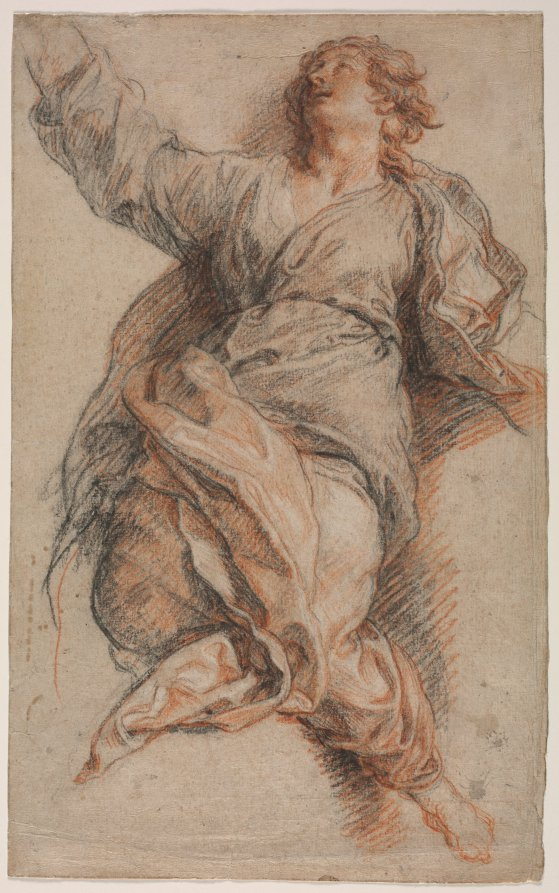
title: St. John the Evangelist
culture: France, 18th century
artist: Charles de La Fosse (French, 1636–1716)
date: c. 1700–1702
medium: black, red, and white chalk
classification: Drawing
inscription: verso, center, in brown ink: 191 [underlined with flourish]; upper left, in graphite: Lot 353 [underlined] / Hotel Drouot / Vente Chardey / 14-17 Mai/77; lower left, in graphite: C. Delafosse [underlined]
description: This drawing is a study for a fresco in the Parisian church of Les Invalides. The structure's four pendentives are each decorated with images of the Four Evangelists, and the Cleveland sheet relates to the design for St. John. La Fosse developed his ideas in numerous preparatory studies before beginning the final painting. He portrayed the religious figures with power and exuberance, imbuing his decorative scheme with unprecedented vigor. Drawings by La Fosse are difficult to find in the United States, and this sheet is an exceptional example of the artist's trois crayons (three-chalk) technique of using black, red, and white chalk together. The chalks are subtly blended, creating the effect of billowing drapery rather than stiff linearity.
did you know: This drawing was used primarily used by La Fosse to study the drapery that covers St. John's body. A nude drawing of the same figure is in Le Havre, France.